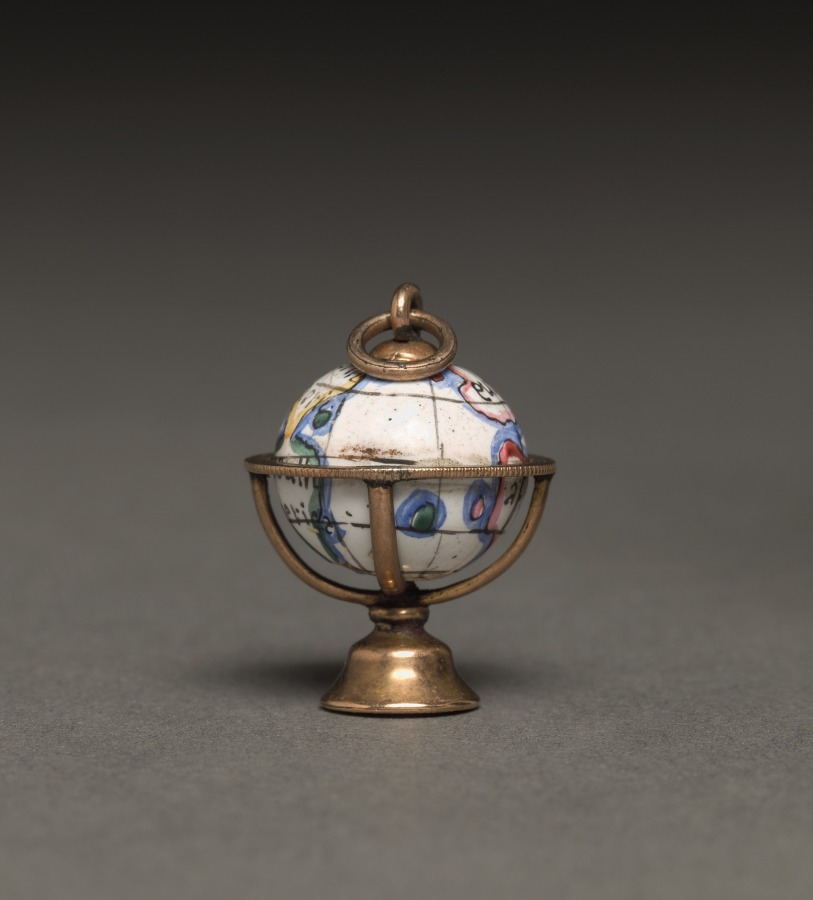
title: Charm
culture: England, mid-18th Century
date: mid-18th century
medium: enamel on metal with gold stand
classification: Enamel